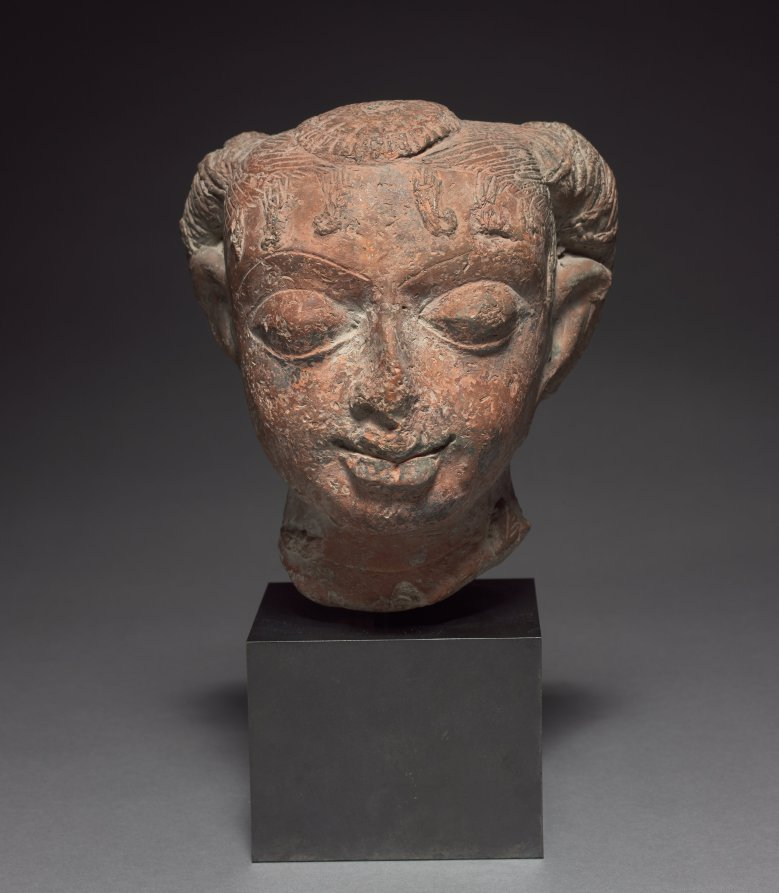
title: Female Head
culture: India, Gangetic plain region, Gupta period, 5th-6th centuries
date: 400s–500s CE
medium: terracotta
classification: Stone